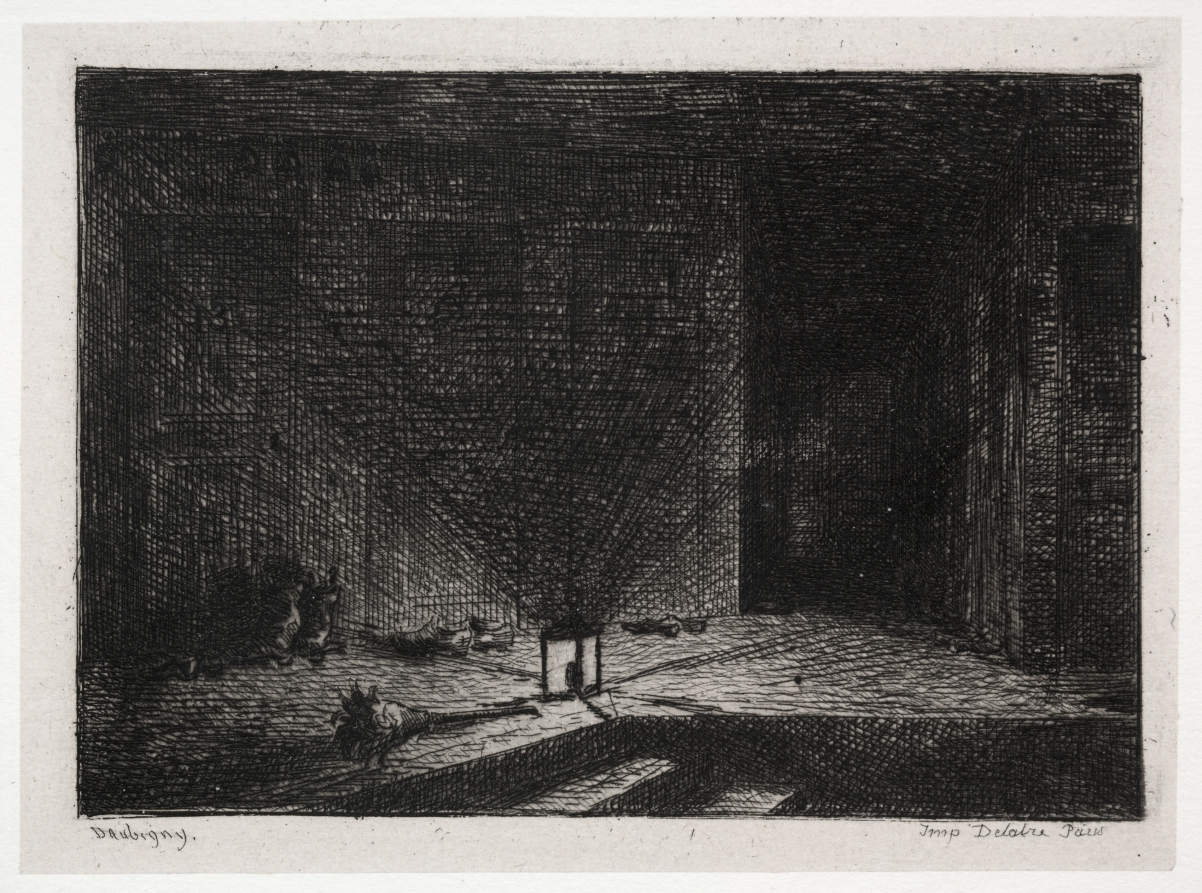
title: The Boat Trip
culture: France, 19th century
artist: Charles François Daubigny (French, 1817–1878)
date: 1861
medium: 16 etchings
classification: Portfolio